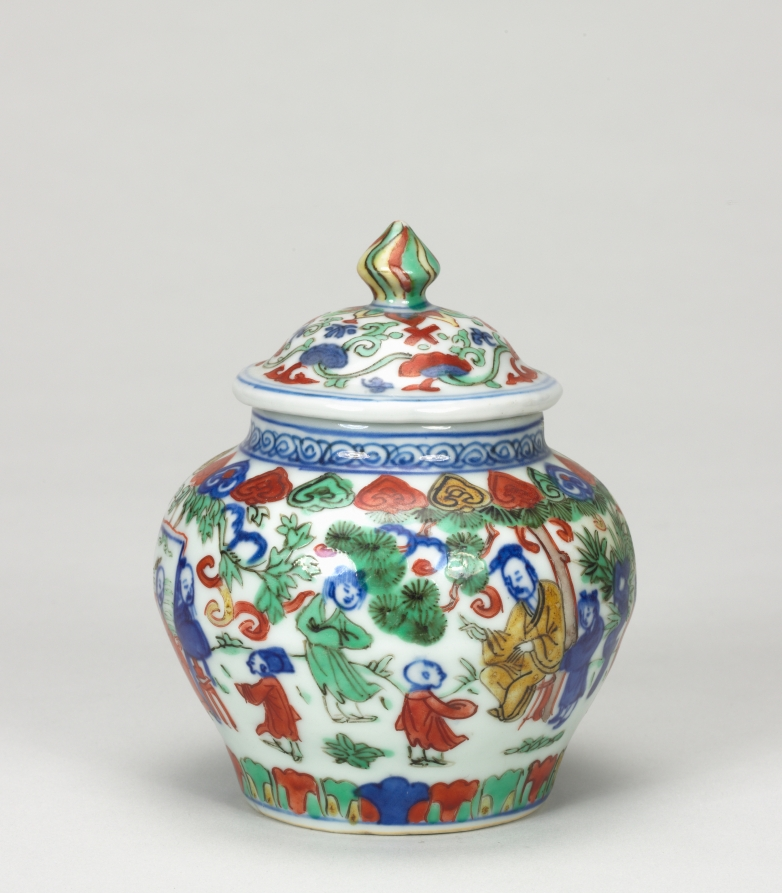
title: Covered Jar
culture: China, Jiangxi province, Jingdezhen kilns, Ming dynasty (1368-1644), Wanli reign (1573-1620)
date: 1573–1620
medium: porcelain with blue underglaze decoration and overglaze enamels in red, green, and yellow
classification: Ceramic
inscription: 大明萬曆年製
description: In the Ming (1368–1644) and Qing (1644–1911) dynasties, luxury items became more affordable to larger parts of the society, including women, merchants, and literati in non-official positions. Imperial patronage and a growing urban population encouraged consumption of luxury goods and local craftmanship. This covered porcelain jar has blue underglaze and overglaze in red, green and blue enamels. It shows Ming dynasty advancements in porcelain decoration and the creative mind of the talented artisans who made it.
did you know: This jar is painted with 16 figures of all ages enjoying a garden setting.